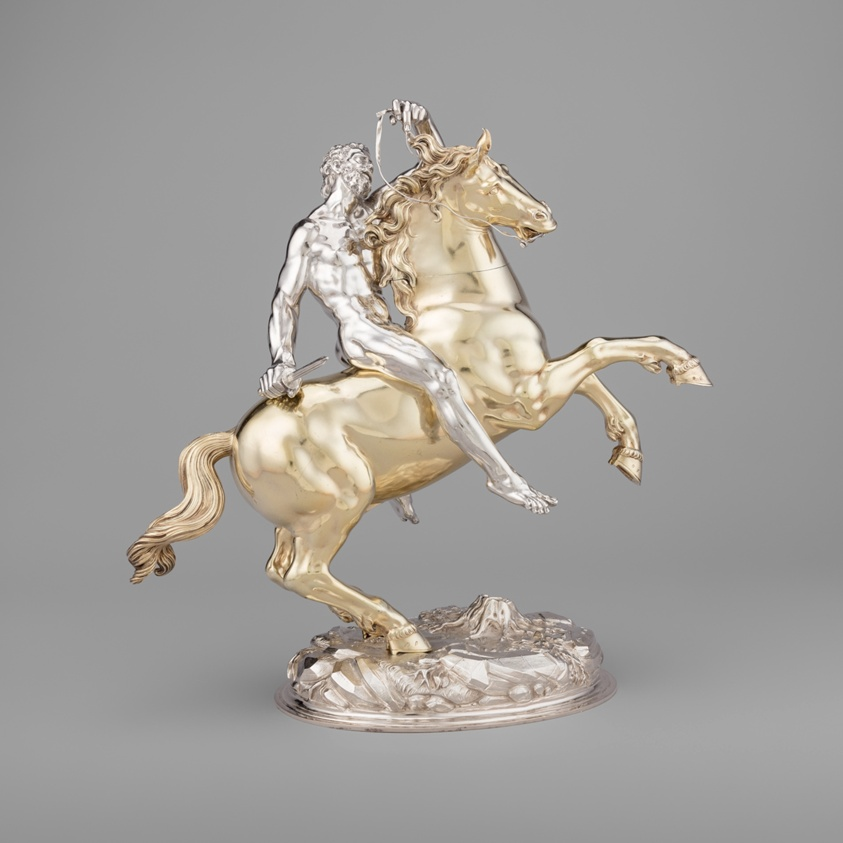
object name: Metalwork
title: Horse and Rider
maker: Hans Ludwig Kienle; German, 1591–1653; Ulm, Germany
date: 1630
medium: Silver and silver gilt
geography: Ulm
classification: statuette; european decorative arts; silver; metalwork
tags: men, horses, warriors, nudity